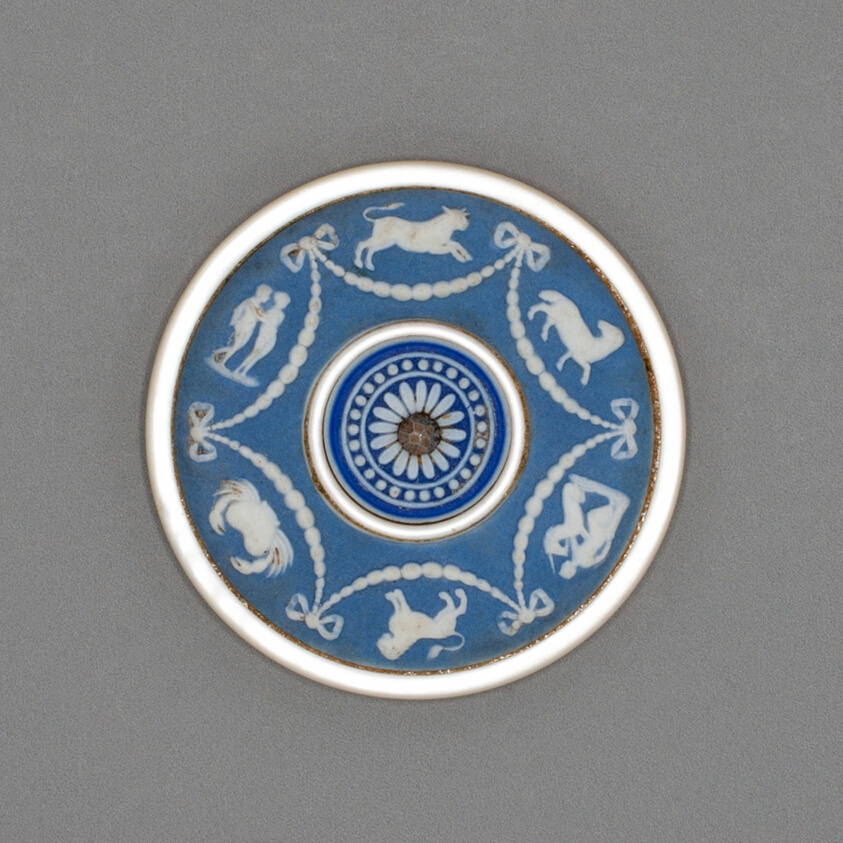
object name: Ceramics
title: Button with Signs of the Zodiac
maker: Wedgwood Manufactory (England, founded 1759)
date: Late 18th century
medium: Stoneware (jasperware)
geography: Burslem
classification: accessories (object genre); stoneware; european decorative arts; ceramics